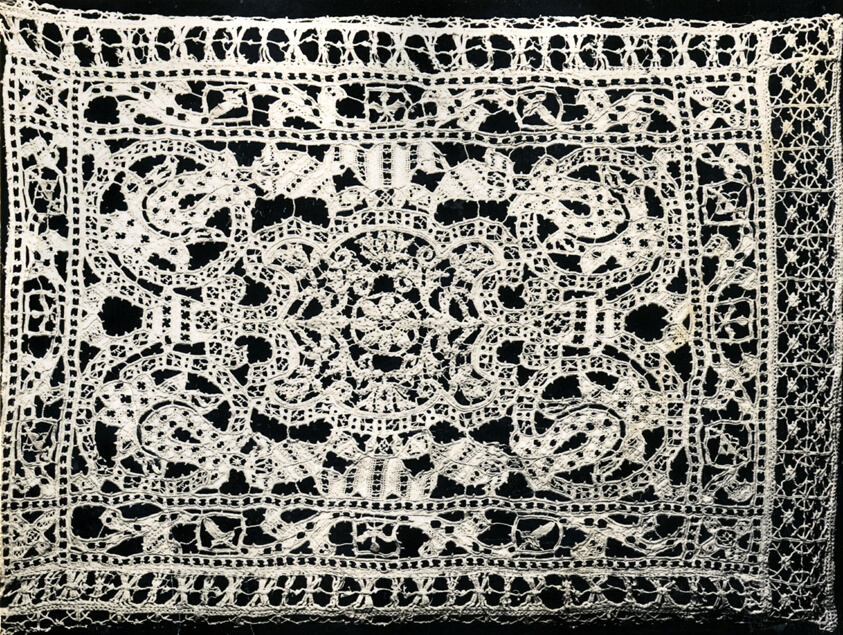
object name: Textile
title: Pillow Cover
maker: Italy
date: c. 1600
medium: Linen, plain weave, front: embroidered in buttonhole, double hem, hem, overcast, and satin stitches; couching and eyelet holes; cut and drawn work with needle lace filling stitches; sides (replacement): 3 strips of cut and drawn work embroidered in buttonhole, coral, hem, and needle lace filling stitches; back: center panel plain weave with cut and drawn work embroidered in double hem, hem and needle lace filling stitches; center panel is a symmetrical scrolling floral motif; inner borders combine geometric and scrolling floral patterns outer borders geometric patterning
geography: Italy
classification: textile; lace & needlework; lace - needle